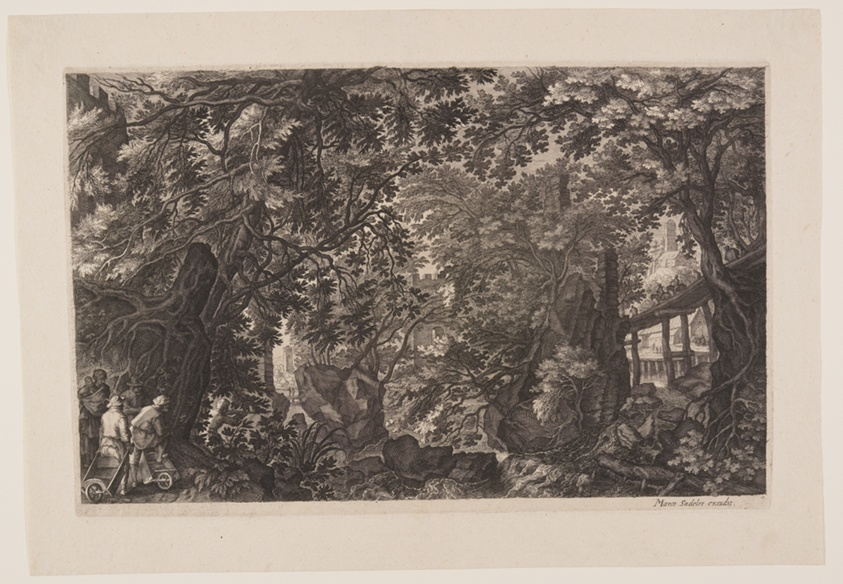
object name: Print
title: Scene Eight: A Forest with a Wooden Bridge, from Eight Scenes from Bohemia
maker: Aegidius Sadeler II (Flemish, c. 1570–1629); after Pieter Stevens (Flemish, 1567-after 1624)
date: 1610/20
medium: Engraving on ivory laid paper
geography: Flanders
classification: print; paper; prints and drawing; engraving